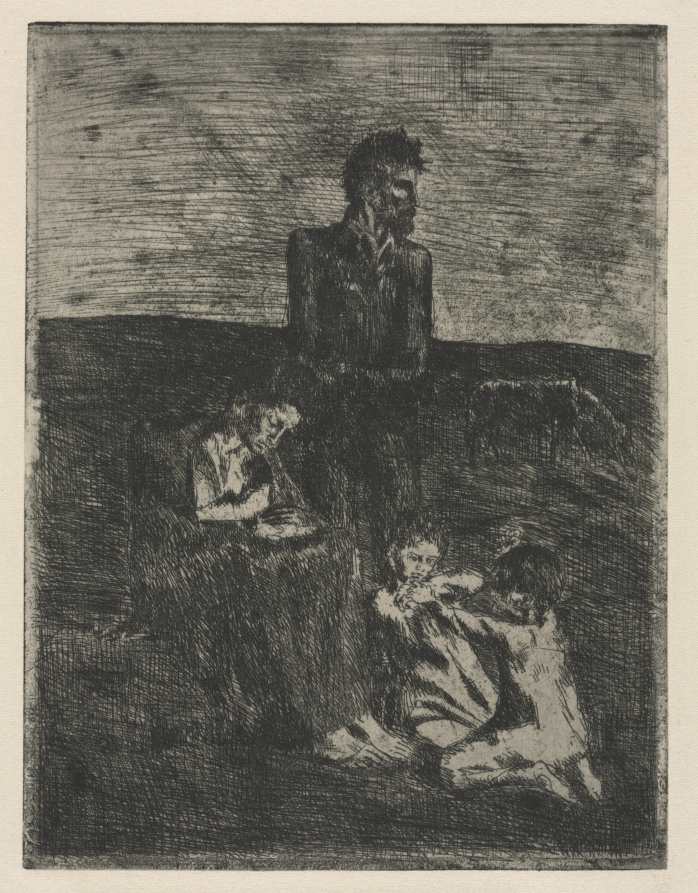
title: The Poor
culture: Spain, 20th century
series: The Saltimbanques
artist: Pablo Picasso (Spanish, 1881–1973)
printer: Louis Fort (French, active 1800s–1900s)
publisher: Ambroise Vollard (French, 1867–1939)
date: 1905, printed 1913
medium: etching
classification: Print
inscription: watermark, at upper left: VAN GELD[ER ZONEN]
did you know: As a struggling artist in the early years of his career, Picasso frequently depicted figures living in poverty or on the margins of society.